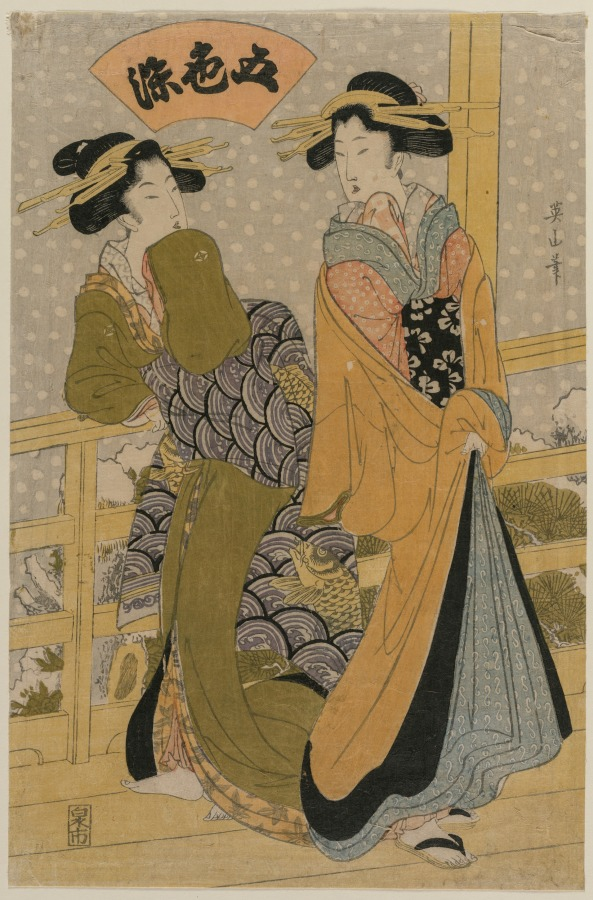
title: Two Courtesans on a Balcony (From the series Five Colors of Ink)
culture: Japan, Edo period (1615–1868)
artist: Kikukawa Eizan (Japanese, 1787–1867)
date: c. early 1810s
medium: color woodblock print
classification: Print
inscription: Signature: Eizan hitsu